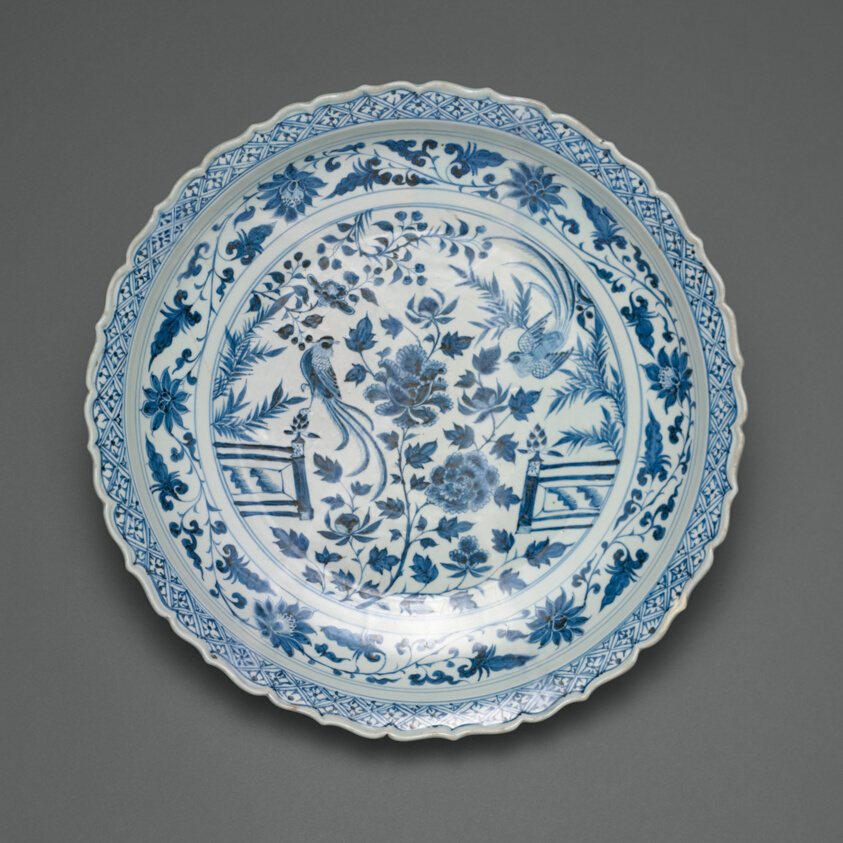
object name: Decorative Arts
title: Shallow Dish with Long-Tailed Birds in a Garden of Stylized Peonies and Fronds, Encircled by a Scrolling Wreath of Camellia and Lotus Blossoms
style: Chinese (culture or style)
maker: China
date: Yuan dynasty (1279–1368), early/mid–14th century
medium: Porcelain painted in underglaze blue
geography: China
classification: dish (vessel); porcelain; ceramics; asian art; decorative arts